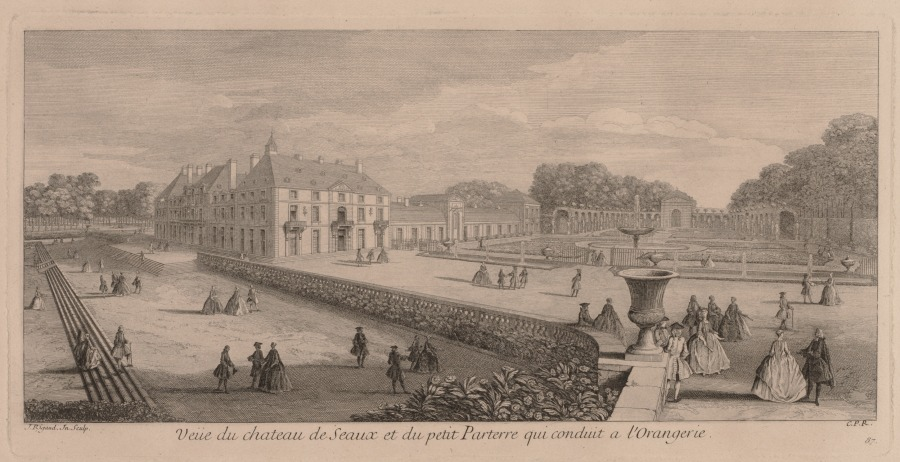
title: Chateau and Garden of Seaux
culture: France, 18th century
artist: Jacques Rigaud (French, 1681–1754)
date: 1736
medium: engraving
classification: Print